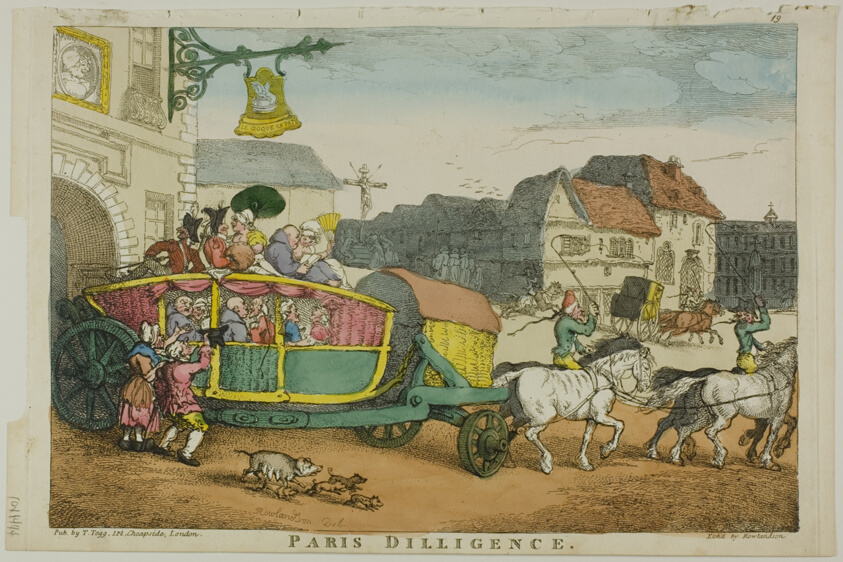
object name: Print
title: Paris Diligence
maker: Thomas Rowlandson (English, 1756-1827); published by Thomas Tegg (English, 1776-1845)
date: 1810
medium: Hand-colored etching on ivory wove paper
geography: England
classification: etching; print; prints and drawing